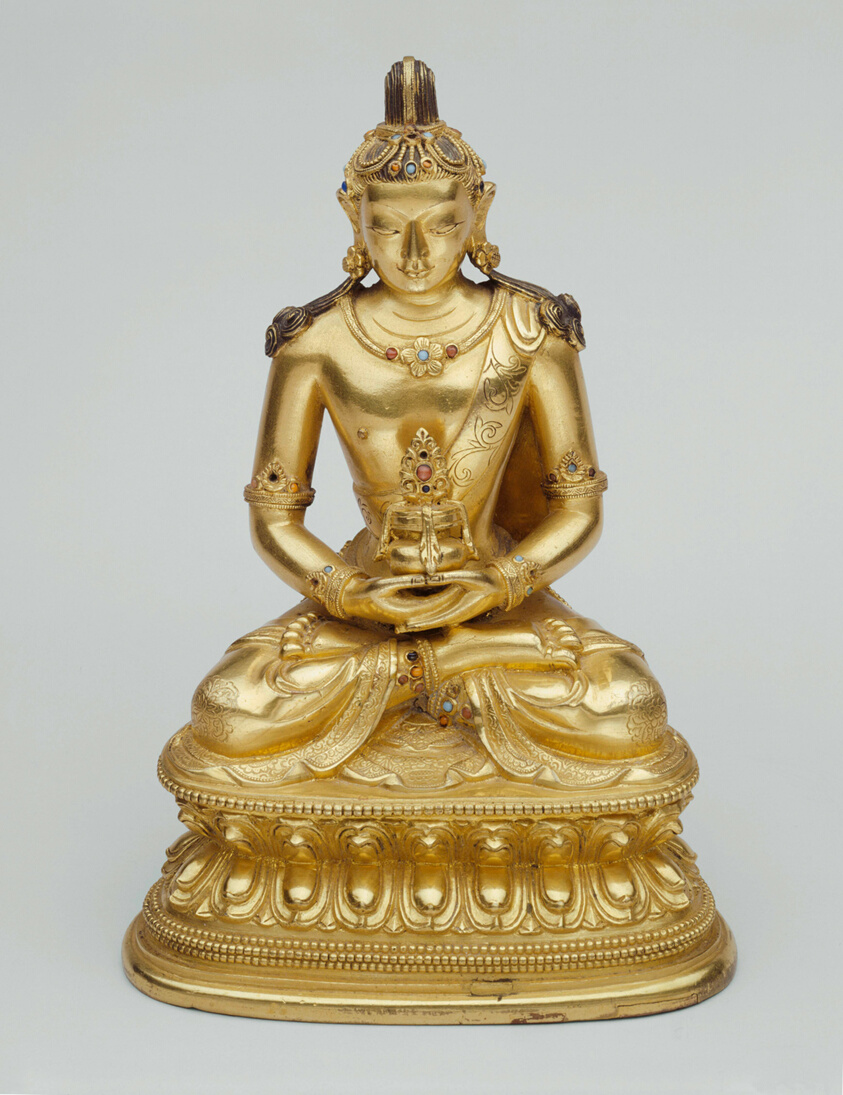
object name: Sculpture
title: Buddha Amitayus Holding a Vase of Longevity (Kalasa)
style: Himalayan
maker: Mongolia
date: 18th century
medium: Gilt bronze inlaid with stones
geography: Mongolia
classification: sculpture; asian art